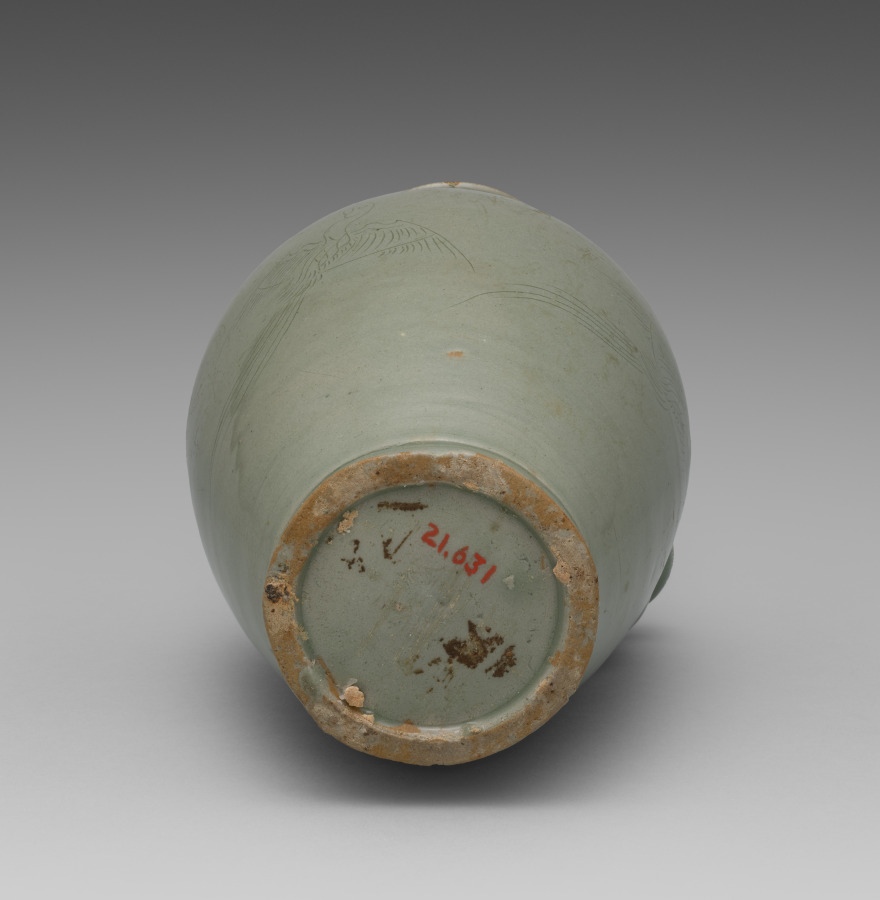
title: Water Ewer for Rituals with Incised Parrot Design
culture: Korea, Goryeo dynasty (918–1392)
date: 1100s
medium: stoneware with celadon glaze, incised and carved decoration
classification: Ceramic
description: This distinctively shaped celadon vessel is a kundika. With a spout on one side, this type of vessel is often used in Buddhist purification rituals. Unlike most existing examples that have an image of a willow tree, this work has a rare flying phoenix design incised on its surface.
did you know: This distinctively shaped vessel is called a kundika in Sanskrit, simply referring to a water bottle.